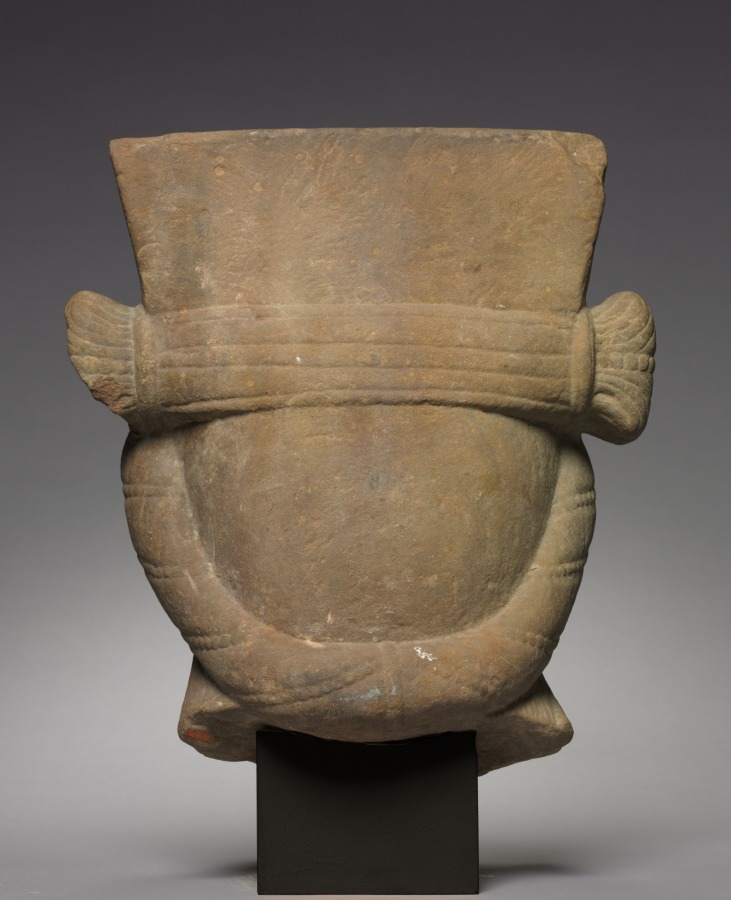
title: Head of Vishnu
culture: Central India, Madhya Pradesh, Vidisha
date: 300s CE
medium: sandstone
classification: Sculpture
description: When complete, this iconic image of the Hindu god Vishnu would have been impressive in scale, approximately life-size. During the Gupta period (c. 319–550 CE), images of Vishnu included a lion head in the center of the crown. The lion communicated royal authority, solar radiance, and the concept of glory. These attributes characterize the power and personality of this deity who ensures the preservation of his creation.